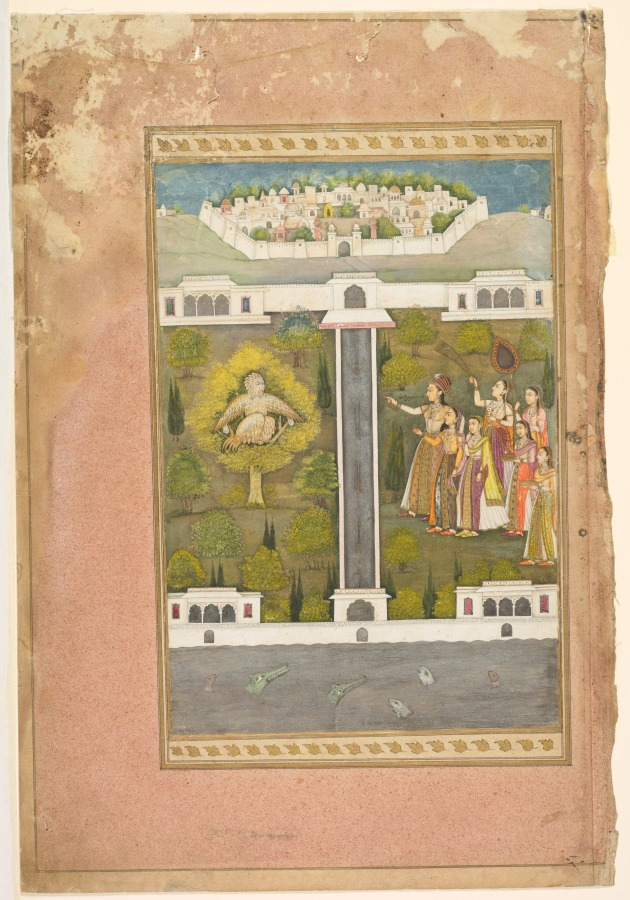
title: Mahliqa, Daughter of the Emperor of China, Pointing at the Bird-Man Khwaja Mubarak: A Leaf from a Poetical Romance Relating to Shah Alam I (recto)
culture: Mughal India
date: c. 1710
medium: Gum tempera and gold on paper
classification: Painting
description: A Persian inscription identifies the bird-man in the tree by name, but the text in which he appears remains unidentified. Also unknown is the Chinese princess Mahliqa (“she who has a face like the moon”), named in a Persian inscription written in front of her face. The artist depicts her in the dress of a Mughal court lady, except for the addition of an unusual headdress, and her handmaidens all look Indian. They gesture to the bird-man from the opposite side of a formal garden canal with fountains. A fortified city lies in the distance behind the walled garden, while creatures peer up at the fabulous composite figure from the water below.